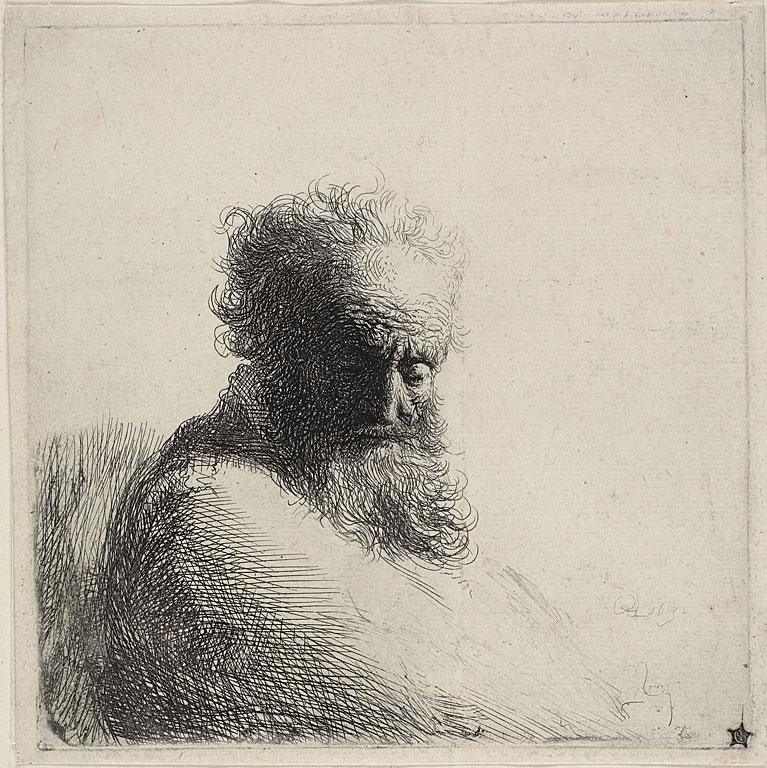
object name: Print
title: Bust of an Old Bearded Man, Looking Down, Three Quarters Right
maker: Rembrandt van Rijn (Dutch, 1606-1669)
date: 1631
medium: Etching on paper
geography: Holland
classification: etching; print; prints and drawing; paper